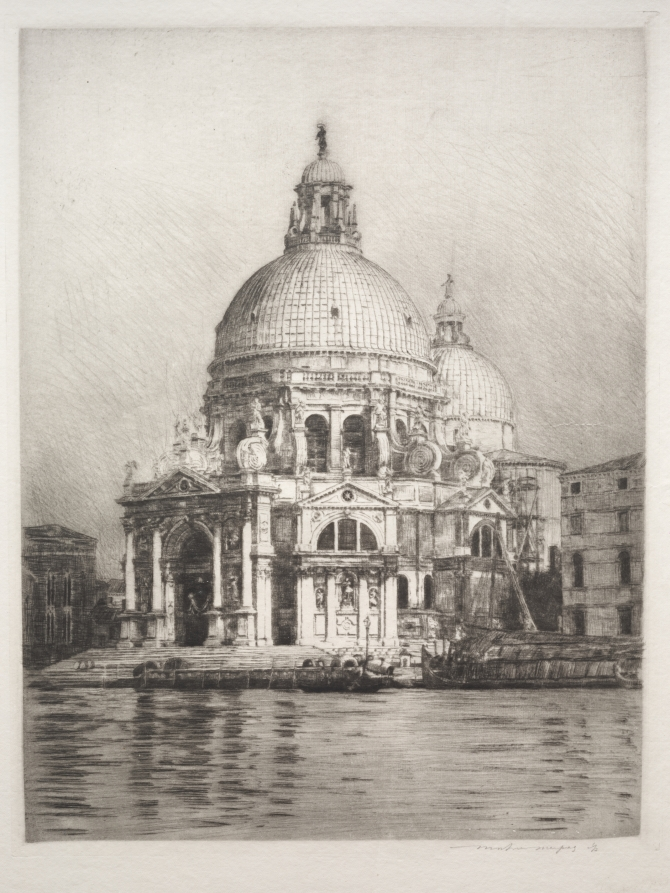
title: Santa Maria Della Salute #1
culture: England, 19th century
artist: Mortimer Menpes (British, 1860–1938)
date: 1910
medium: etching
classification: Print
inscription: signed, within beveled edge, in graphite; upper left corner, in red ink: "no. 2"